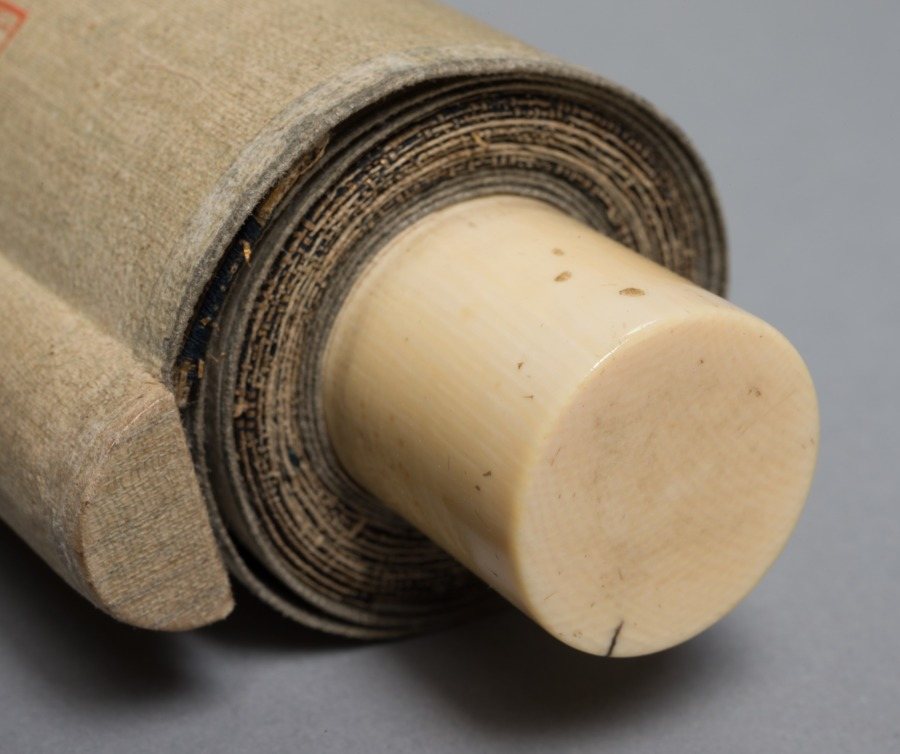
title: Landscape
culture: Japan, possibly Edo period (1615-1868)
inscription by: copy after Ishō Tokugan (Japanese, c. 1359–1437)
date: early 1600s to mid-1800s?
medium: hanging scroll; ink and slight color on paper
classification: Painting